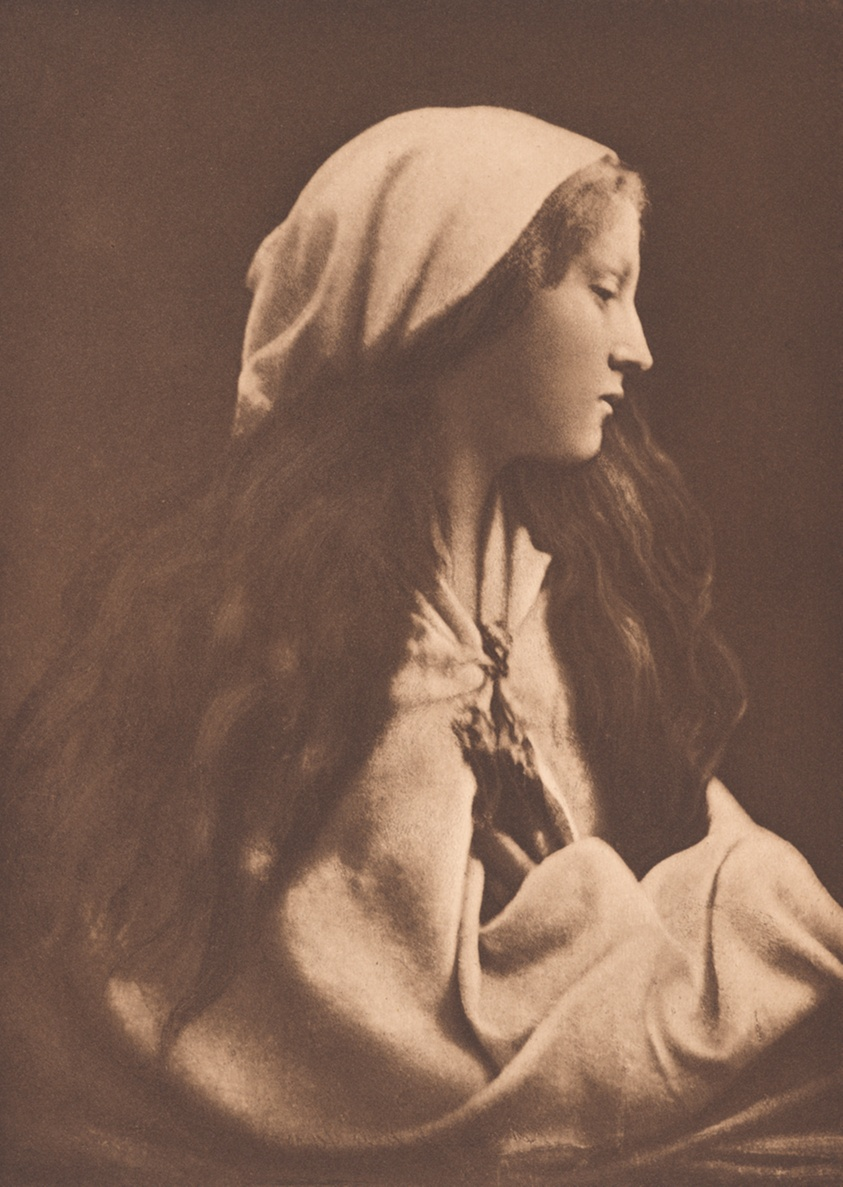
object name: Photograph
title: The Day Dream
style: 19th century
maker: Julia Margaret Cameron (English, 1815–1879)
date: 1869, printed October 1890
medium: Photogravure, from "Sun Artists, Number 5" (1890)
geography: England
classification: photogravure; photomechanical process; photography; photograph